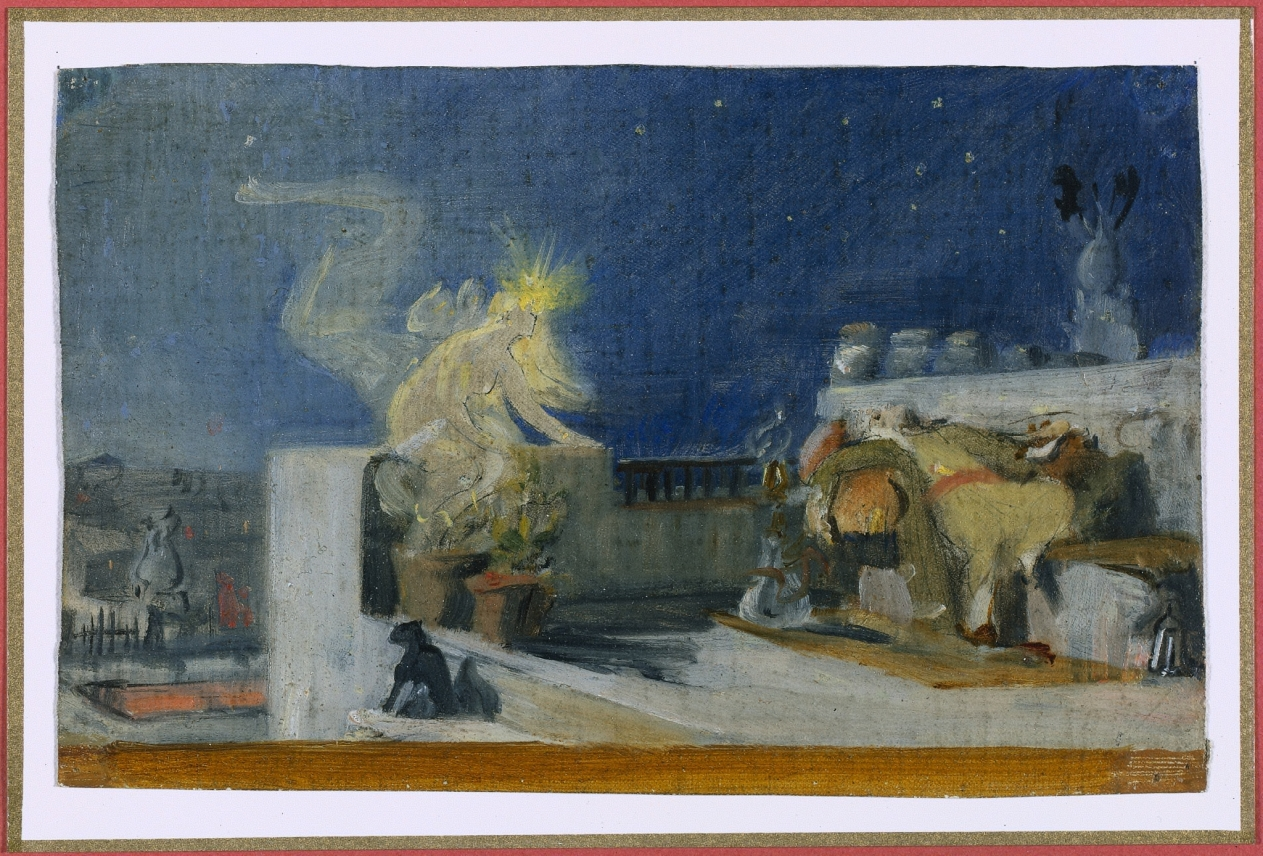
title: Sketch for "The Oriental Dream"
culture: France, 19th century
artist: Jean Lecomte du Nouÿ (French, 1842–1923)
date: before 1904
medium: oil on fabric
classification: Painting